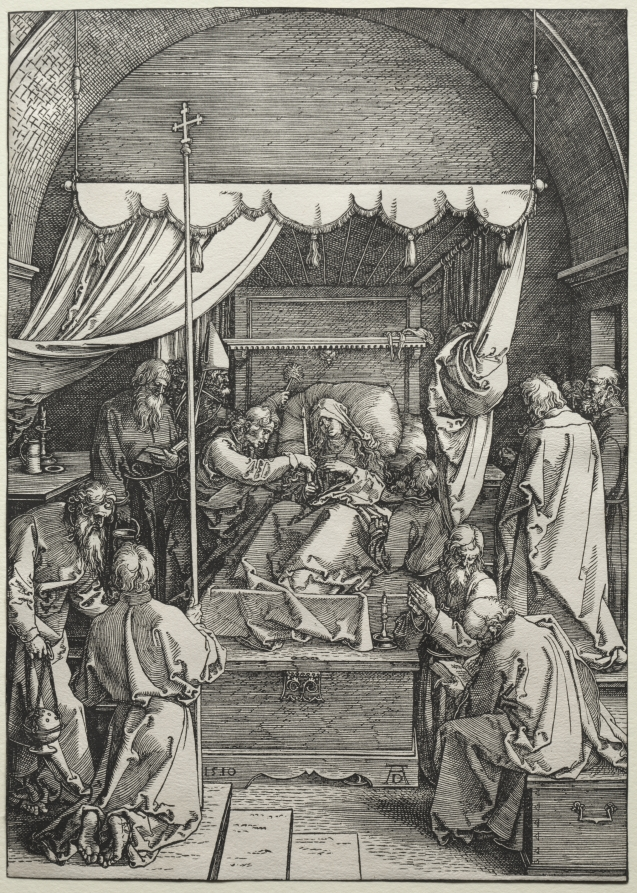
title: The Death of the Virgin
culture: Germany, early 16th Century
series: The Life of the Virgin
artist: Albrecht Dürer (German, 1471–1528)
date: 1510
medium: woodcut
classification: Print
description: Dürer depicted the scene of the Virgin’s death (1959.99.18) as an intimate one, with the apostles keeping vigil around her deathbed. Three days later they witnessed Mary’s bodily assumption into paradise where she was crowned the Queen of Heaven (1959.99.19). The final print (1959.99.20), which some believe was conceived independently from the series because it falls outside of the typical narrative, shows the Virgin in a domestic setting surrounded by several saints, angels, and putti that celebrate her life-an especially fitting way to end the series.